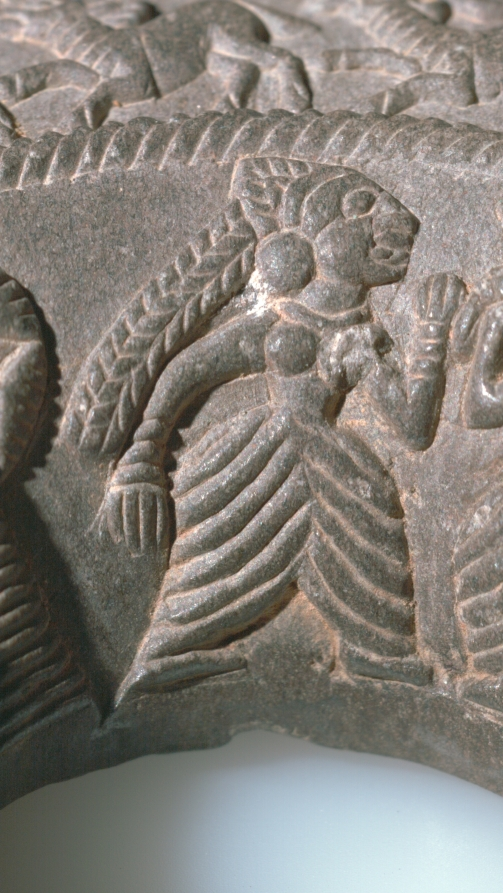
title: Ringstone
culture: India, Maurya period (322–185 BCE)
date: 200s BCE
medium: steatite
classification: Sculpture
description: Ringstones are among the earliest works of art to be created in stone during India's historical period. This example is finely carved with detailed images of affectionate couples and palm trees, running animals, and geometric motifs in concentric circles. The function of ringstones remains uncertain, since none of the surviving examples is inscribed or explained in a text.